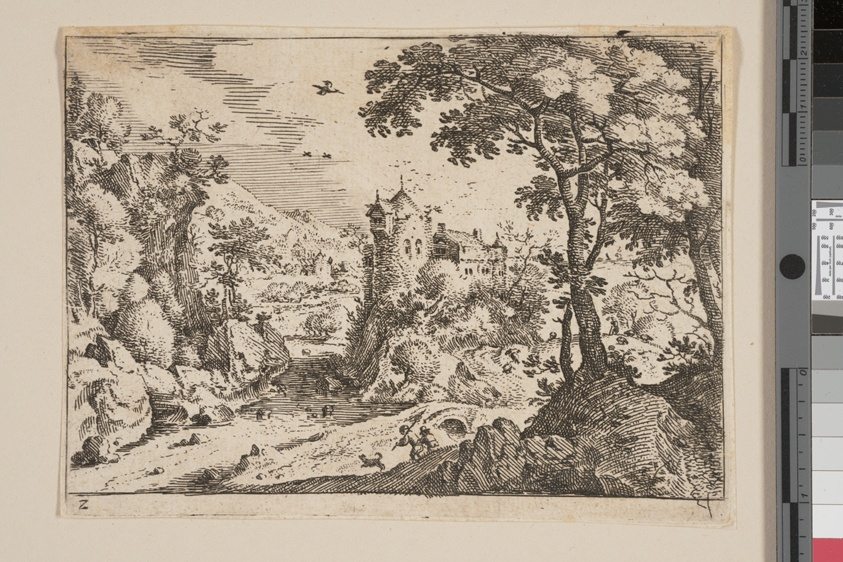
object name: Print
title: Stream between Rocky Hillside and Castle, from Landscapes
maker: Jacob Savery; Flemish, 1566–1603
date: c. 1595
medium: Etching on ivory laid paper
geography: Flanders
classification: etching; paper; print; prints and drawing